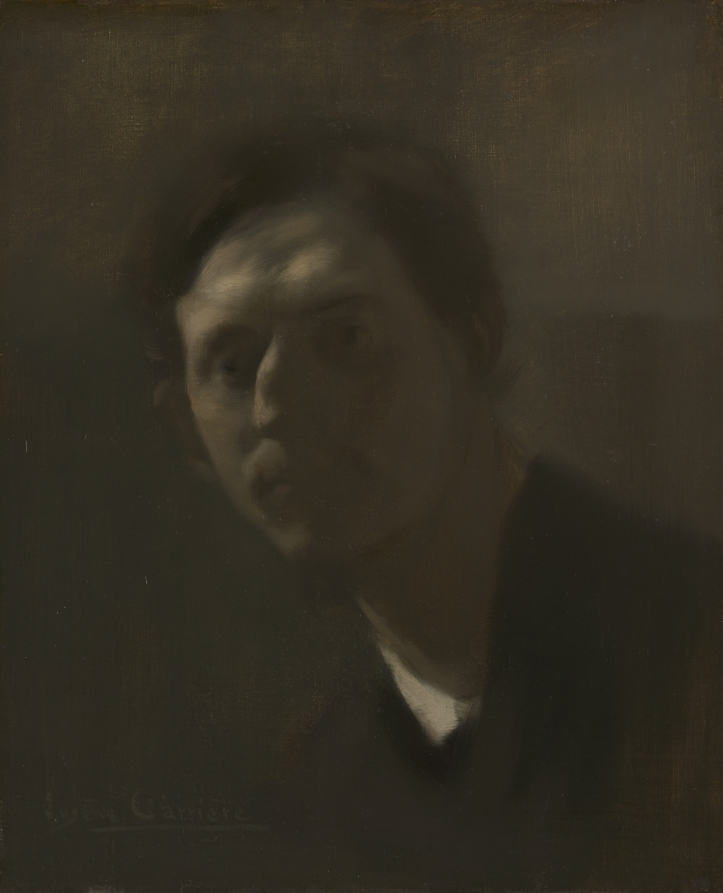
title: Armand Berton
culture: France, 19th century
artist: Eugène Carrière (French, 1849–1906)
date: c. 1891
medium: oil on fabric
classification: Painting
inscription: Signed in paint at lower left: Eugène Carrière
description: Associated with the 19th-century Symbolist movement in France, Carrière developed a distinctive, almost monochromatic palette suggesting a dream world. The limited color in this portrait of his friend, the deaf painter Armand Berton, also focuses attention on the psychology of the sitter. Translucent glazes make Berton's face emerge from the shadows. Engulfed in silence, Berton seems to rely on his other senses to perceive the world around him.